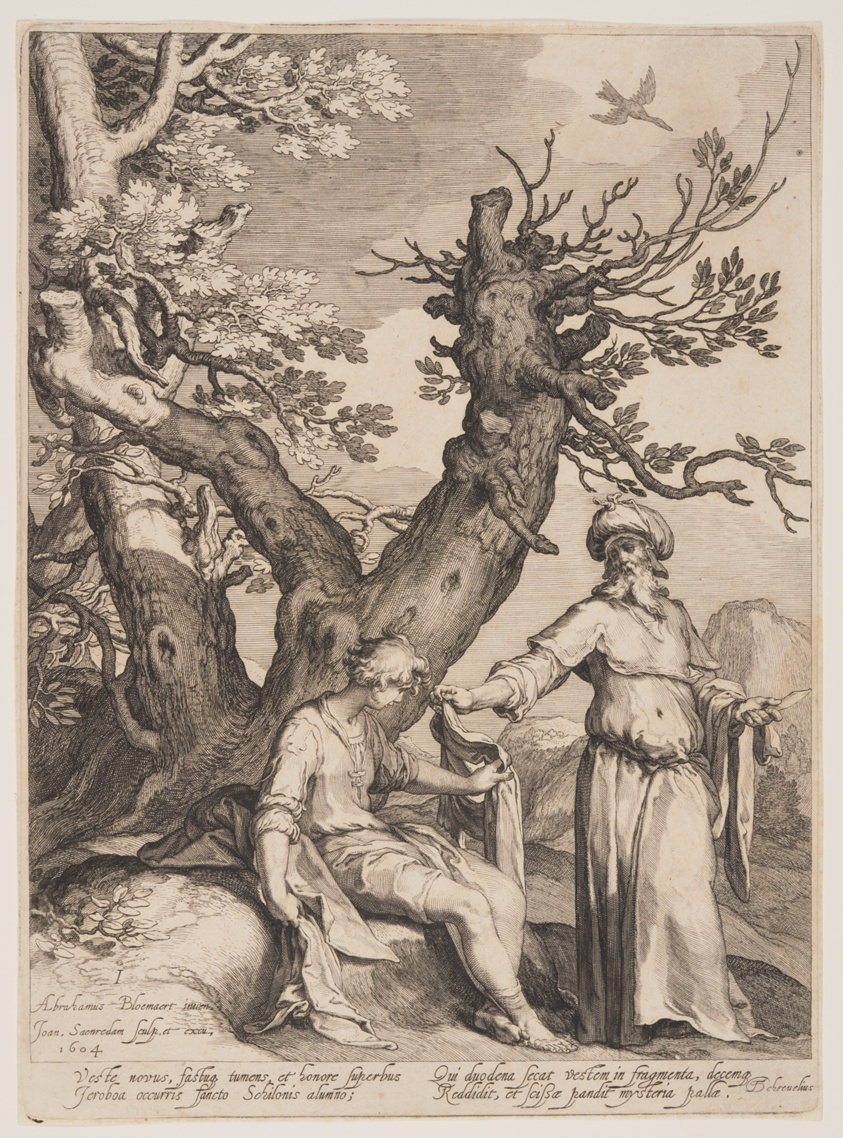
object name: Print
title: Ahajah Divides his Cloak into Twelve Parts, from Four Scenes from the Life of the Prophets, Isaiah, Ahajah and Elisha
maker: Jan Saenredam (Dutch, 1565–1607); after Abraham Bloemaert (Dutch, 1566–1651)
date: 1604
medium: Engraving on ivory laid paper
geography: Netherlands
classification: print; paper; prints and drawing; engraving